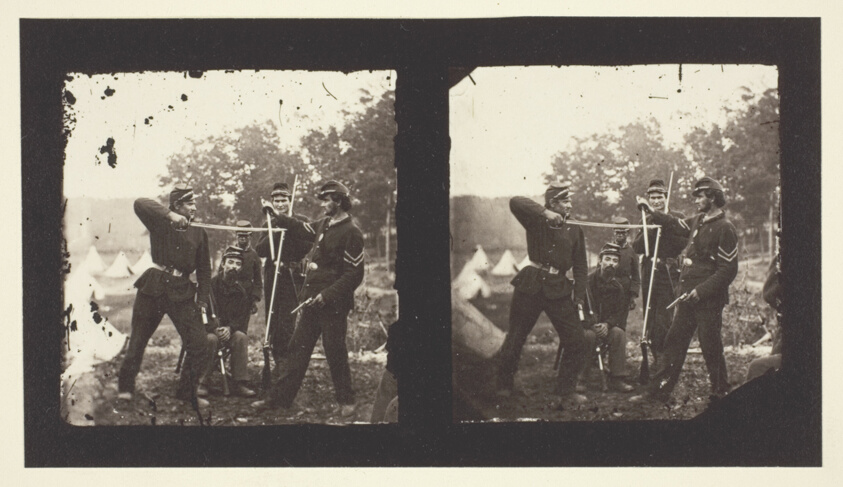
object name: Photograph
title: Untitled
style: 19th century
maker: Arist unknown, possibly by Mathew Brady; American, 19th century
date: 1850–1900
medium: Albumen print, stereo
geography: United States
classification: albumen silver print; photographic process; photography; photograph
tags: documentary